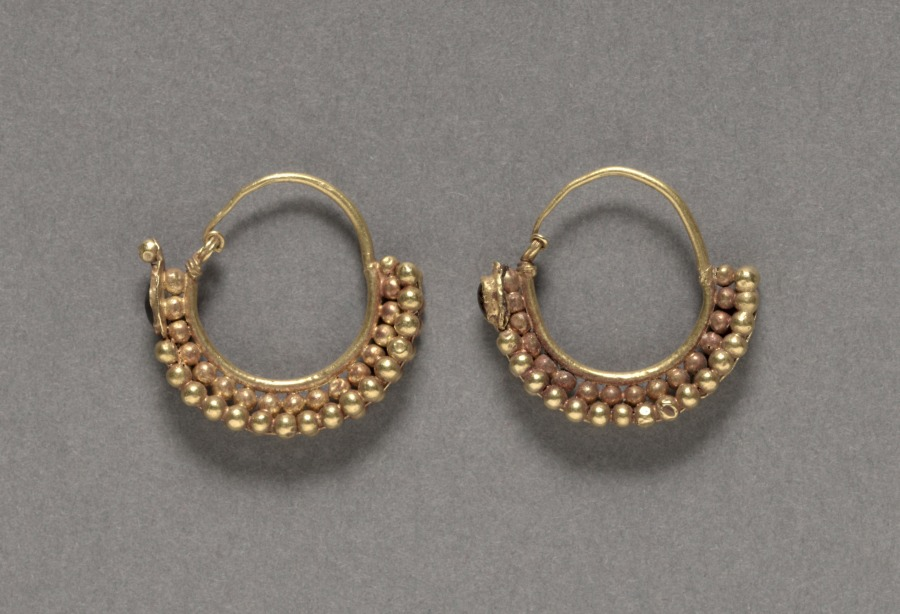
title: Earrings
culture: Syria, Roman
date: 100 BCE–100 CE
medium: gold and garnet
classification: Jewelry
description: Each of these earrings is formed from a simple hoop that ends in a hook-and-loop closure. An oval garnet is fixed below the loop on each earring; one earring has a much larger garnet, and a small ball affixed above the setting. The lower portion of each earring is decorated with two parallel rows of granules.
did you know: These two earrings are nearly identical; one lacks a gold bead above the garnet.